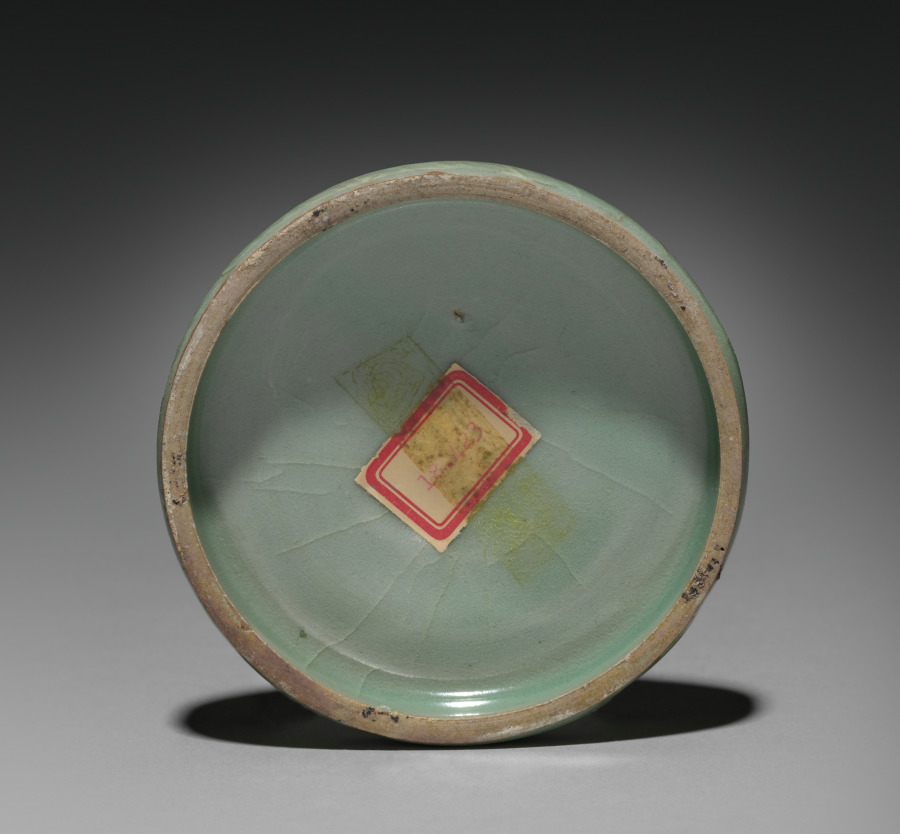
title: Box and Cover (lid)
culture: Korea, Goryeo dynasty (918–1392)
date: 918–1392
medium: celadon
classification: Ceramic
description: Celadons, spoons, seals, and bronze mirrors were the most common burial objects in tombs during the Goryeo period (918-1392). Once used to contain color powder, rouge and eyebrow gel for makeup, this small container was one of the standard goods that furnished elites' tombs. Goryeo-period women and men used the grain powder of rice or millet for whitening their skin, safflower extract for rouge, and plant ash or soot for eyebrow gel. Yet, natural-looking make-up seems to have been the most favorable one in Korea according to the travelogue by Xu Jing (1091-1153), the Chinese diplomat who visited Korea in 1123.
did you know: This ceramic container was used to store incense or cosmetics.